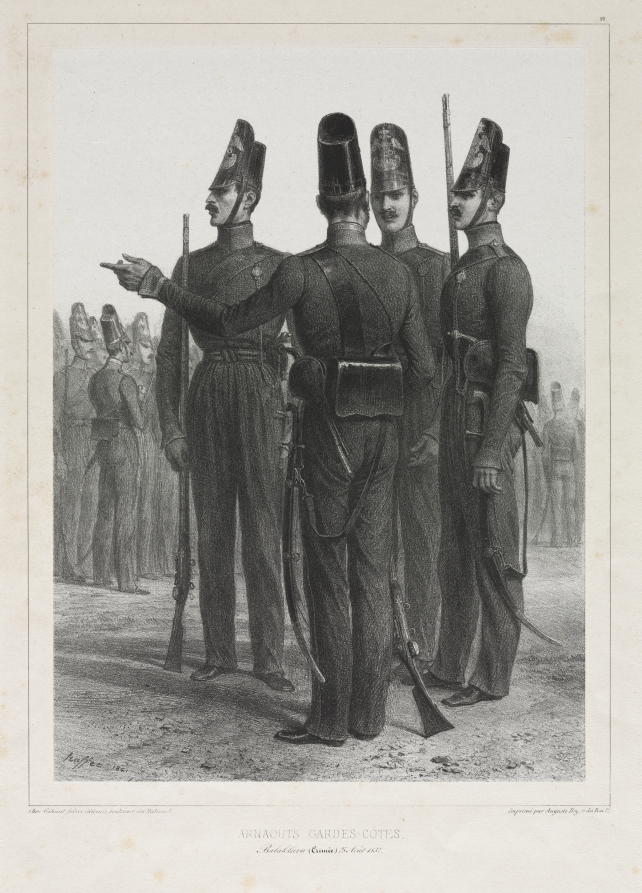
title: Arnoutes Gardes-Côtes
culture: France, 19th century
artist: Auguste Raffet (French, 1804–1860)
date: 1841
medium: lithograph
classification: Print